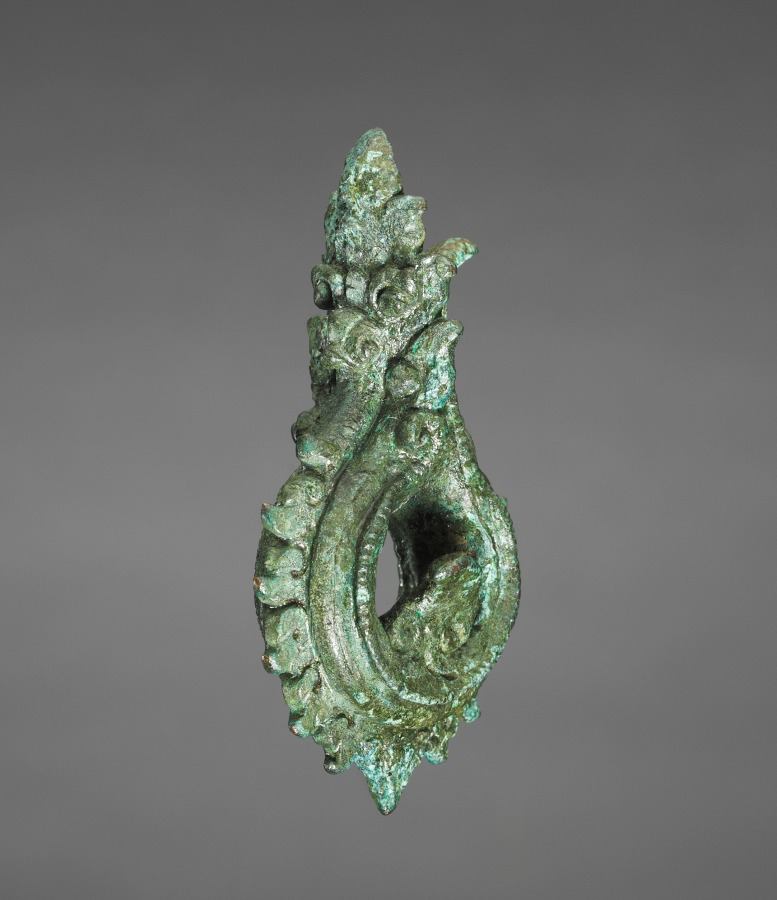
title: Earring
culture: Cambodia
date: 1200s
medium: bronze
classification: Jewelry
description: This pair of earrings is in the form of naga, or water serpent, one of the most popular decorative motifs in Cambodian art. While bronze objects such as furniture and palanquin fittings and finials, hooks, rings, etc., were among the most typical items of the classical Angkorean art (12th–13th century), jewelry is very rare. Originally they must have been gilt. It is conceivable that the present pair may not have been used as a regular ear ornament but enhanced a Khmer sculpture, a common practice, which would explain their heavy weight and large size.